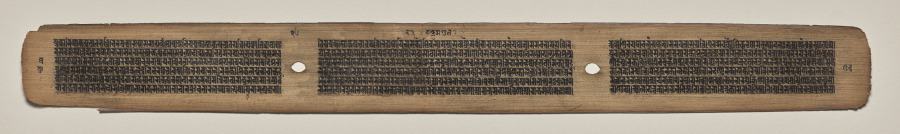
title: Text, Folio 26 (verso), from a Manuscript of the Perfection of Wisdom in Eight Thousand Lines (Ashtasahasrika Prajnaparamita-sutra)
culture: Eastern India, Bihar, Vikramashila Monastery. Painting: Nepal, Kathmandu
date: Sunday, September 14, 1119 (year 239 of the Newar Samvat in the month of Ashvina)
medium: gum tempera and ink on palm leaves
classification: Painting